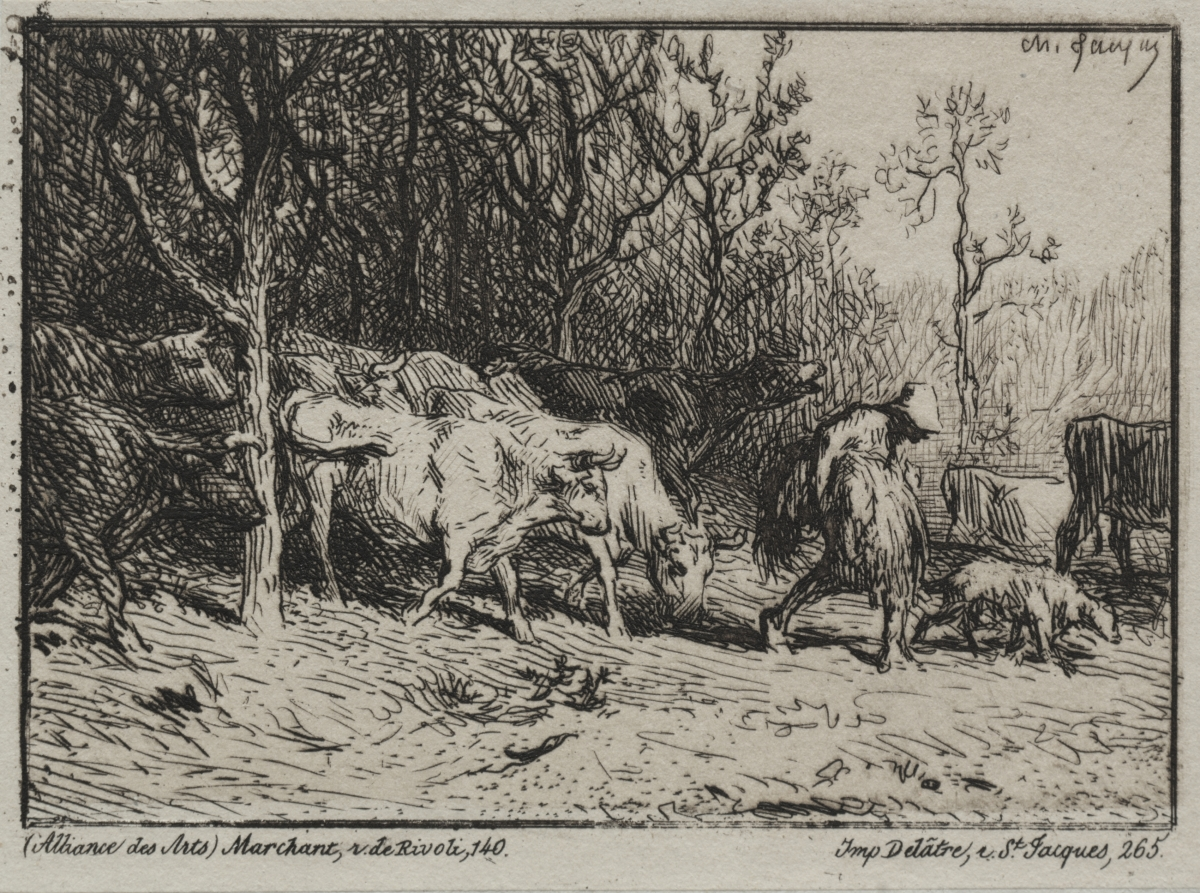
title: Cowherd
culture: France, 20th century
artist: Charles-Émile Jacque (French, 1813–1894)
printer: Auguste Delâtre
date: c. 1850–60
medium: etching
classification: Print